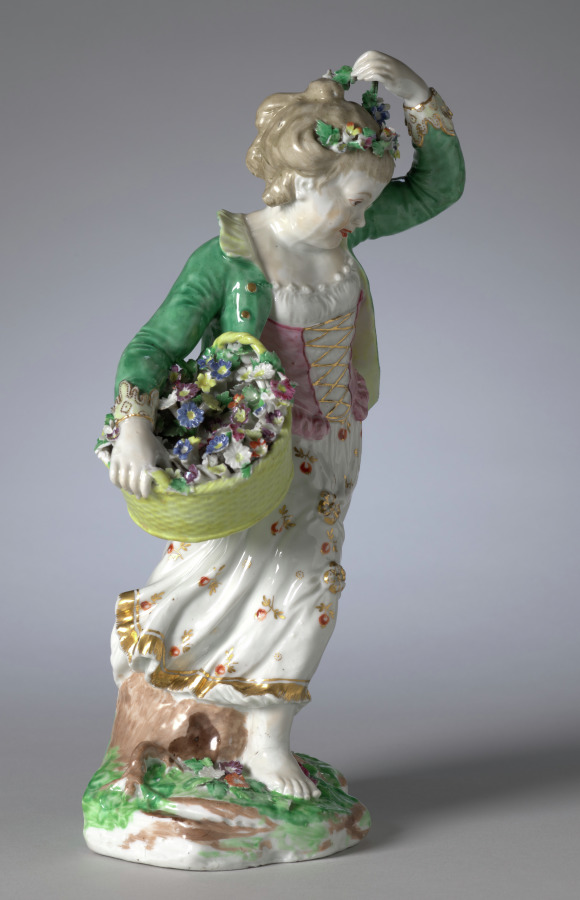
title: Figure of Spring from the Four Seasons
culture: England, Bristol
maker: Bristol Porcelain Factory (British, 1770–81)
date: c. 1775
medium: hard-paste porcelain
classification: Ceramic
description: The modern notion of childhood as a time of innocence and simplicity emerged during the second half of the eighteenth century. This understanding of adolescence led to numerous depictions of children as personifications of the four seasons. Here spring is portrayed as a young girl adorning her hair with flowers. The flowers filling her basket and growing in the grass around her signal spring’s arrival.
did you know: Allegorical figures most often decorated a table during the dessert course, providing amusing subjects for conversation.